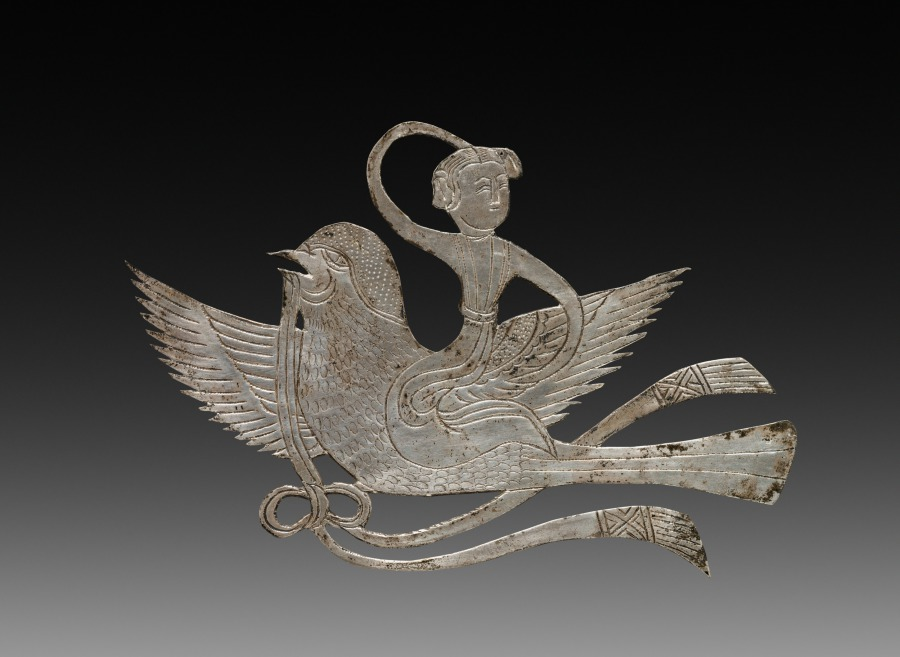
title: Inlay for a Mirror or Box: Lady on a Bird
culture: China, Tang dynasty (618-907) - Song dynasty (960-1279)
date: c. 900–1000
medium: beaten silver with chased details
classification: Metalwork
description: The p'ing-t'o technique of inlaying gold and silver foil on lacquer produced luxurious articles of elegance and fragility. These stray silver inlays were originally mounted on a mirror back or a cosmetic box whose lacquered surface has disintegrated. They combine auspicious symbols of Indian and Chinese origin--human-headed birds whose melodies filled the Buddhist paradise, and bird-riding deities who inhabited the skies of Taoist mythology. Like these imaginary beings, the lions were probably paired in a radial design; at least one has been lost.